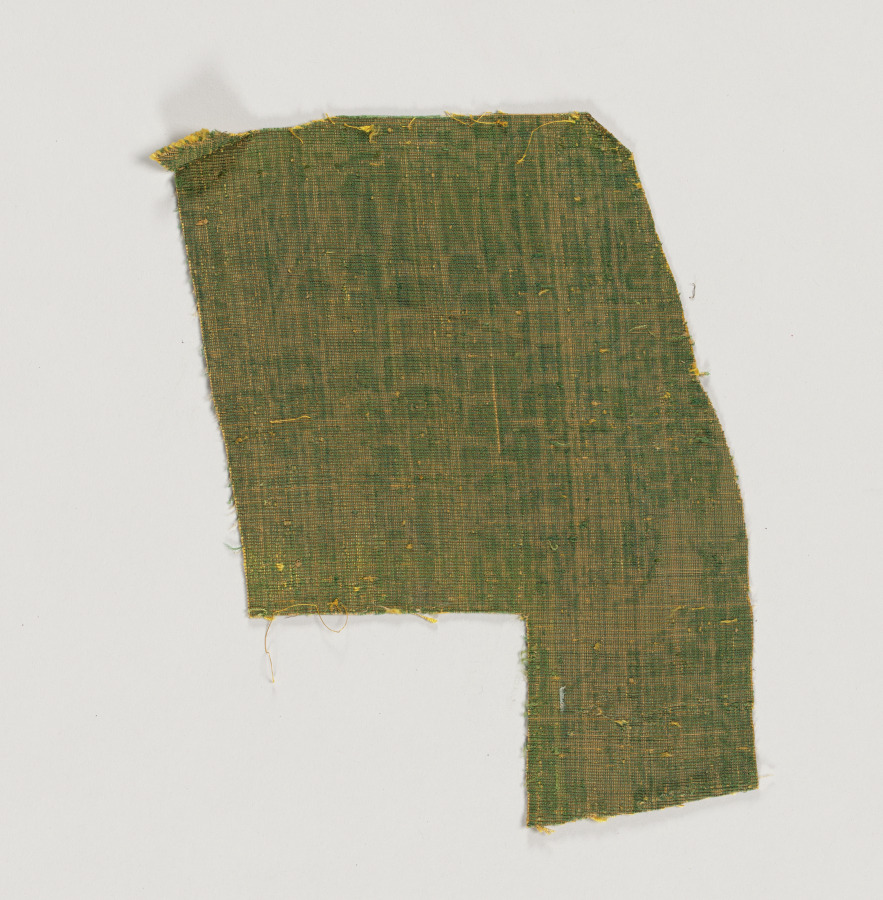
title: Velvet Fragments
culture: Spain, early 16th century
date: early 16th century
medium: velvet (cut, voided, and brocaded): silk and gold thread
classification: Velvet